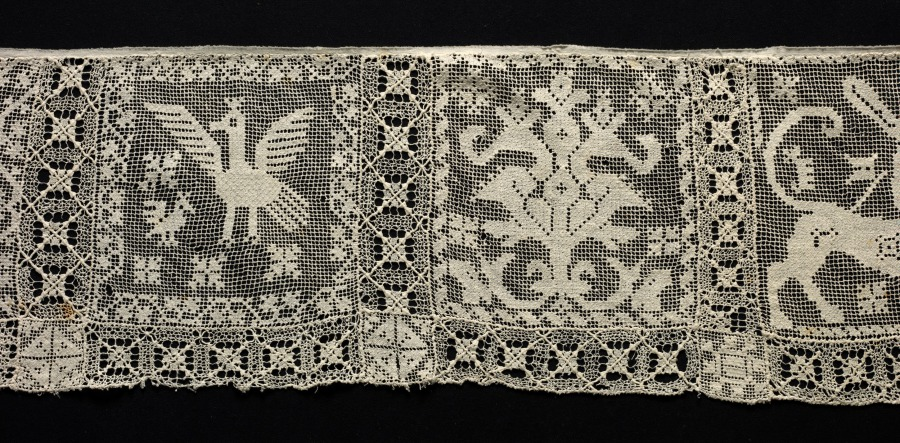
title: Band with Various Fantastic Creatures and Vegetal Patterns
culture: Italy, 1800s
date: 1800s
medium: Bleached linen (est.): needle lace, filet/lacis (knotted ground and darned in two directions)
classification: Lace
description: The reversed and backward orientation of many of the squares in this band of lace suggests that this was not their original layout. They were most likely taken apart and later joined back together in a disoriented manner.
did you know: The square showing a man in midair above a bull-like creature is reminiscent of the Minoan "Bull Leaping" fresco at the Knossos palace complex.